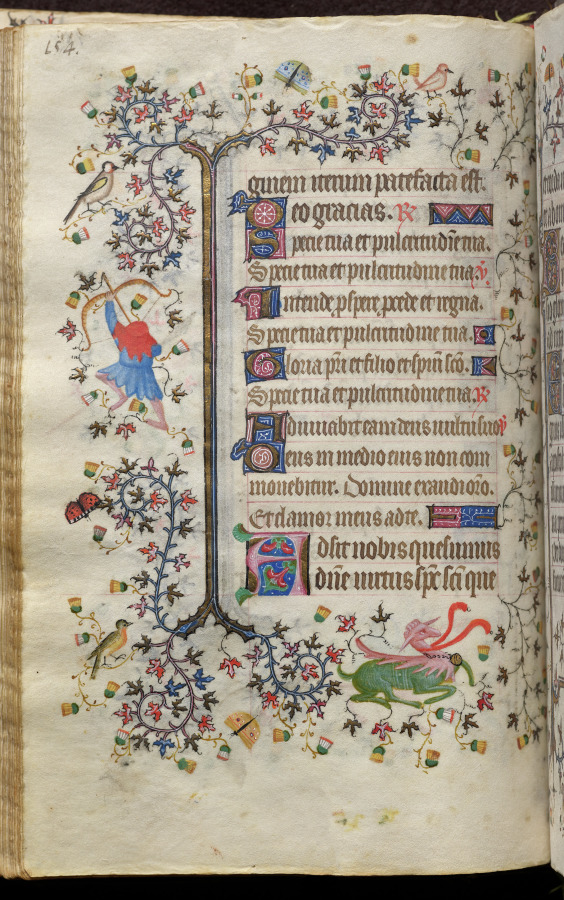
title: Hours of Charles the Noble, King of Navarre (1361-1425): fol. 77v, Text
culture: France, Paris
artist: Master of the Brussels Initials and Associates (French)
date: c. 1405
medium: ink, tempera, and gold on vellum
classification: Bound Volume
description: This precious volume was obviously highly prized by its owner, the French-born King of Navarre, who had his coat of arms painted on no less than twenty folios. Rather than directly commissioning this manuscript from a specific workshop, it seems that Charles the Noble acquired his book of hours -- perhaps ready-made for the luxury market -- while on a trip to Paris in 1404-05. A collaborative effort, six painting styles are evidenced within the pages of this codex, those of two Italians, two Frenchmen, and two Netherlanders. The painter who was responsible for the planning and decoration of the book, and who produced seventeen of the large miniatures, was a Bolognese artist known as the Master of the Brussels Initials. His principal assistant, responsible for most of the borders, was a Florentine who signed his name "Zecho" da Firenze on folio 208 verso.